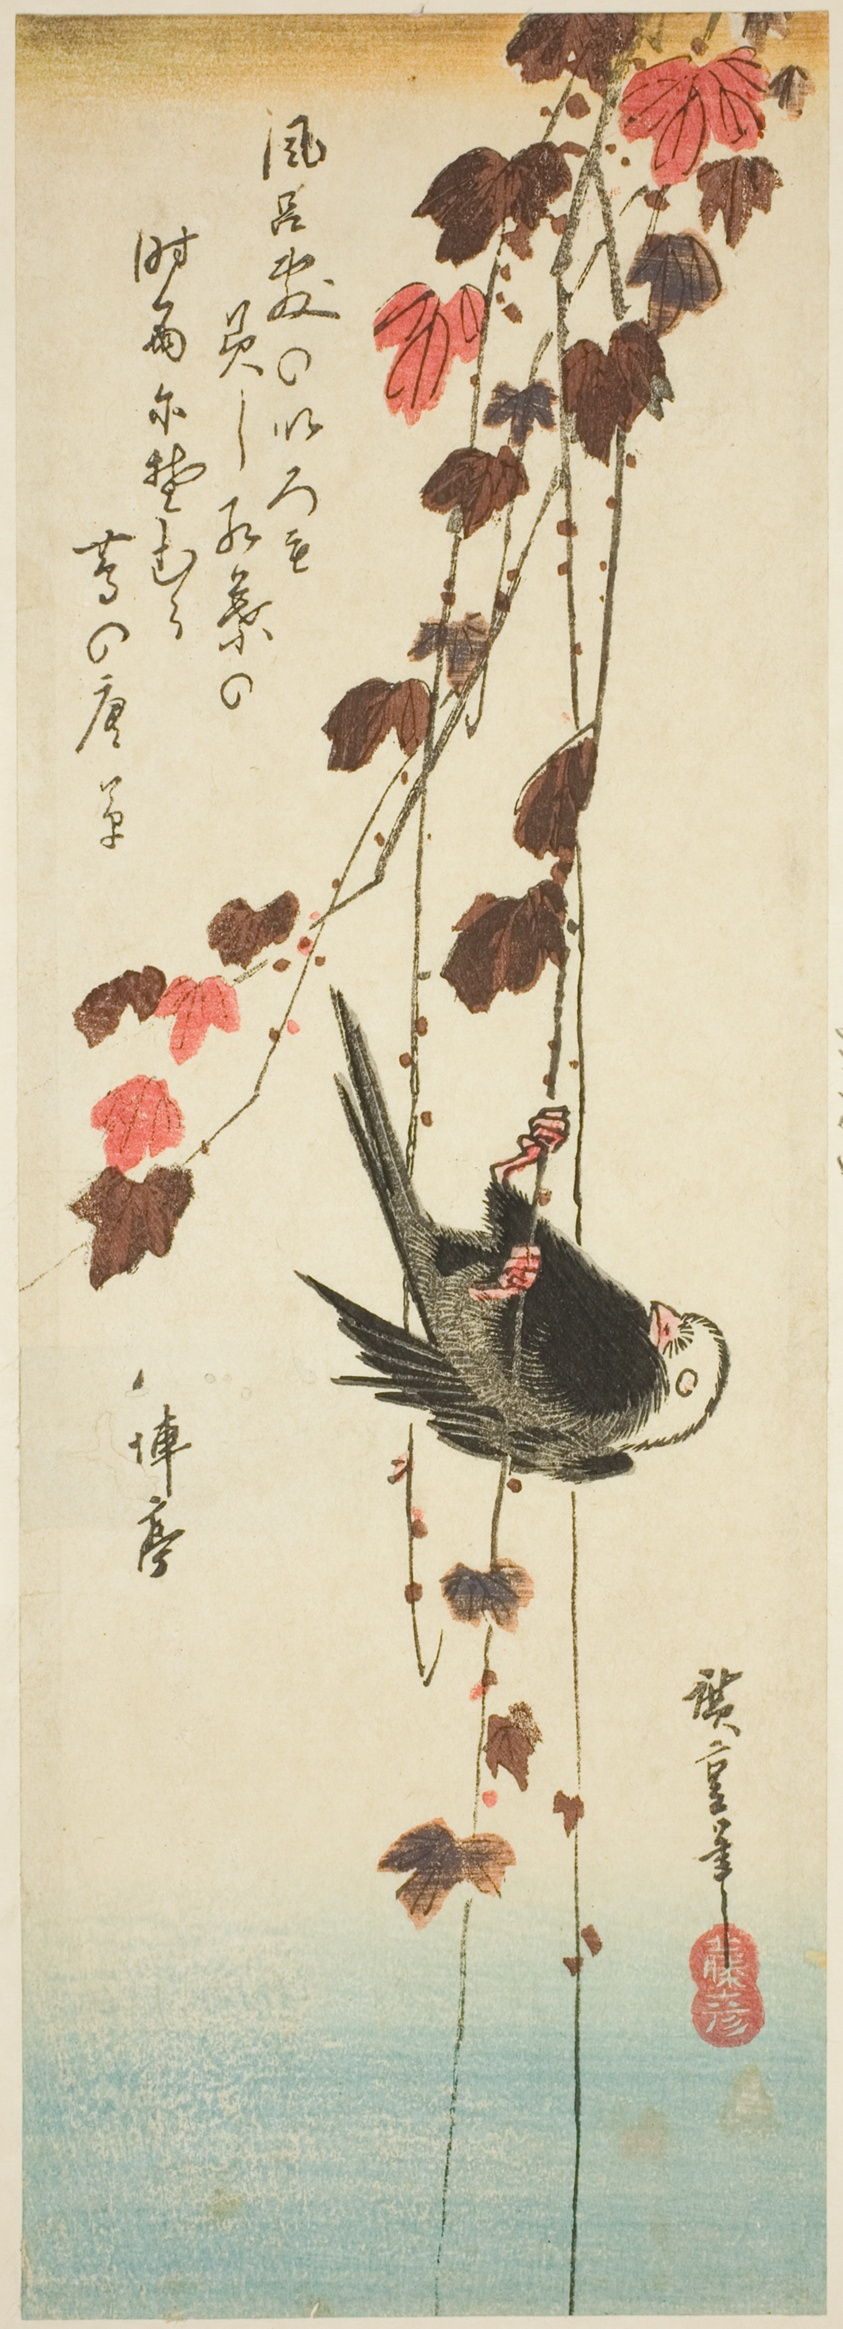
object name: Print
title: White-headed bird and ivy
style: Japanese (culture or style)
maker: Utagawa Hiroshige 歌川 広重; Japanese, 1797-1858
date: mid–1830s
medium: Color woodblock print; chutanzaku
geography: Japan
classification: woodblock print; print; asian art